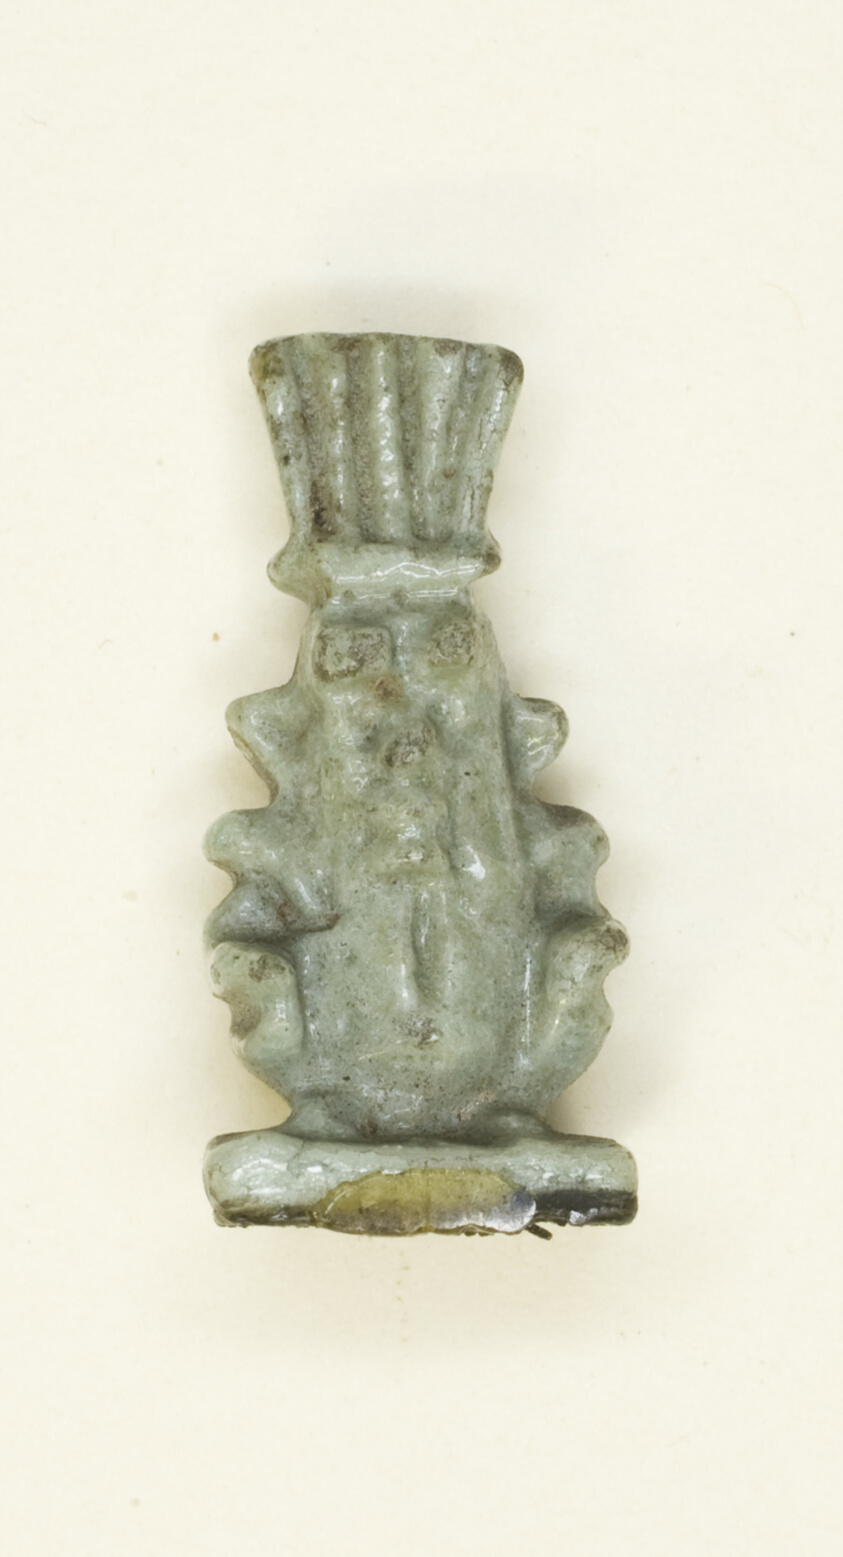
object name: Costume and Accessories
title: Amulet of the God Bes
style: egyptian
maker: Egyptian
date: Third Intermediate Period–Late Period, Dynasty 21–31 (about 1069–332 BCE)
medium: Faience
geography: Egypt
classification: amulet; jewelry; ceramics; ancient art; costume; faïence (composite material)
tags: gods (deities)